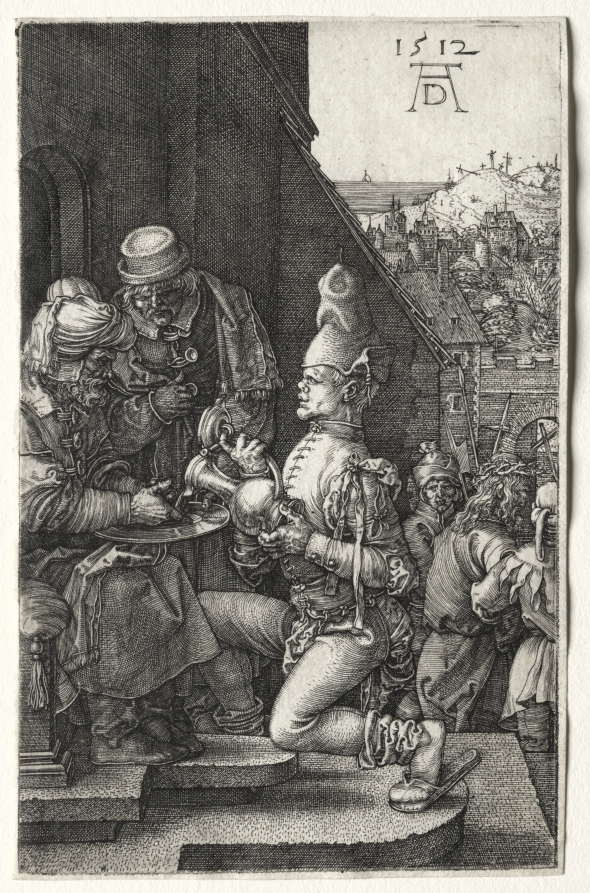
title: Pilate Washing His Hands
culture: Germany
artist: Albrecht Dürer (German, 1471–1528)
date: 1512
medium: engraving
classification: Print